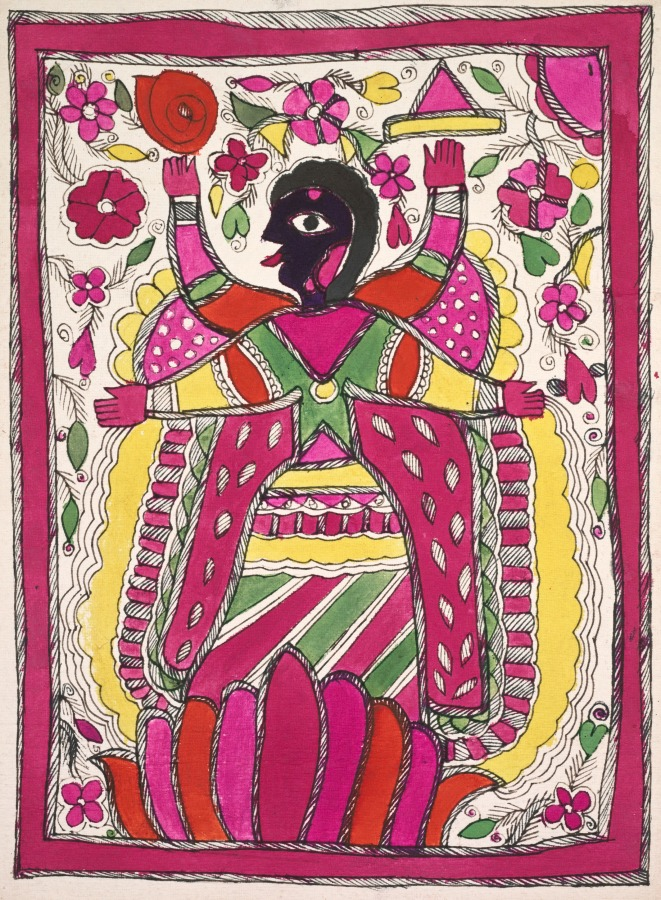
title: Large, multi-armed figure facing left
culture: Eastern India, Bihar State, Mithila or Madhubani School, 20th century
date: 1900s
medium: ink and color on paper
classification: Painting